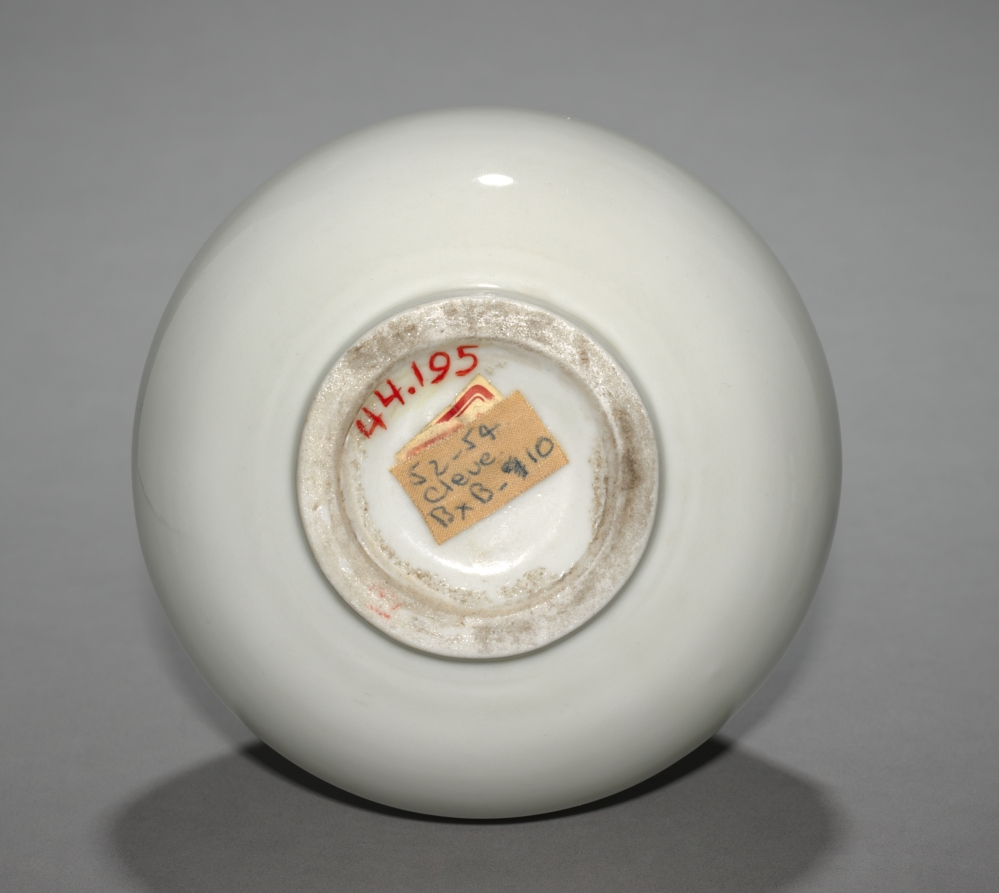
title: Bottle-shaped Vase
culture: China, Qing dynasty (1644-1911), Kangxi reign (1662-1722)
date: 1662–1722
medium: porcelain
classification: Ceramic